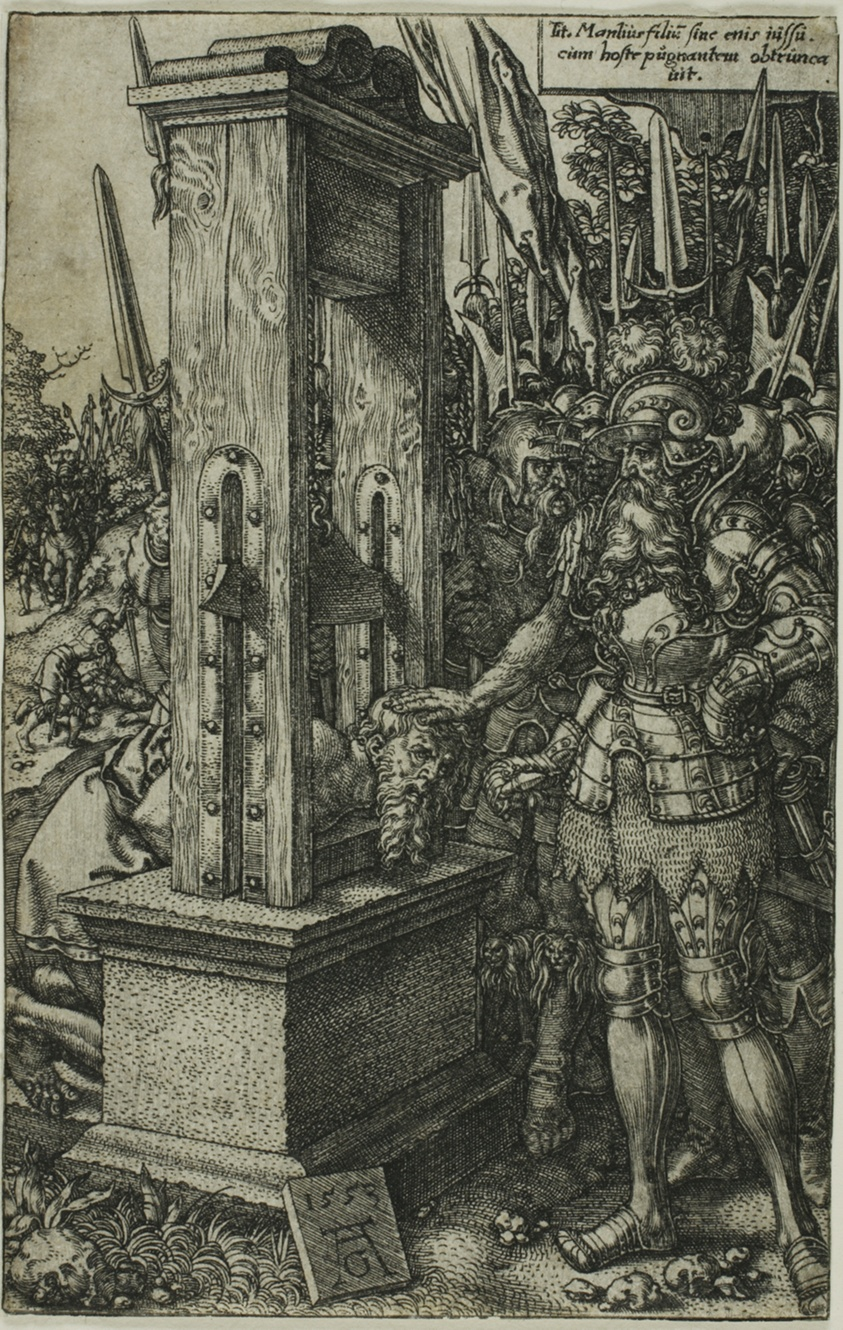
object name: Print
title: Titus Manlius Beheading his Son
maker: Heinrich Aldegrever (German, 1502-c. 1560)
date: 1553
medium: Engraving in black on ivory laid paper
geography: Germany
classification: engraving; print; prints and drawing